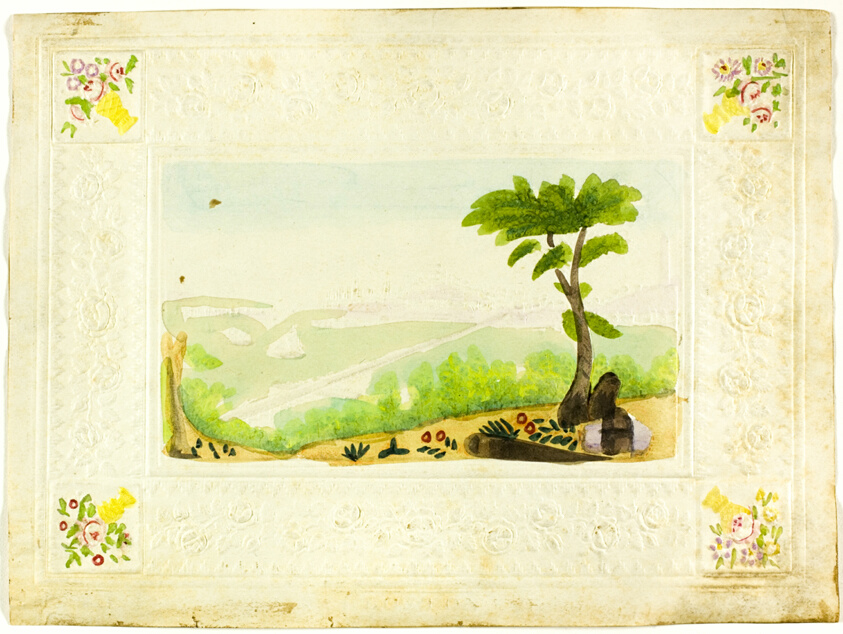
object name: Drawing and Watercolor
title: View of Boston from the Hospital at Chelsea (valentine)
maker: Unknown Artist; English, 19th century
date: c. 1840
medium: Watercolor on embossed ivory wove paper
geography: England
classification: valentine; prints and drawing; paper